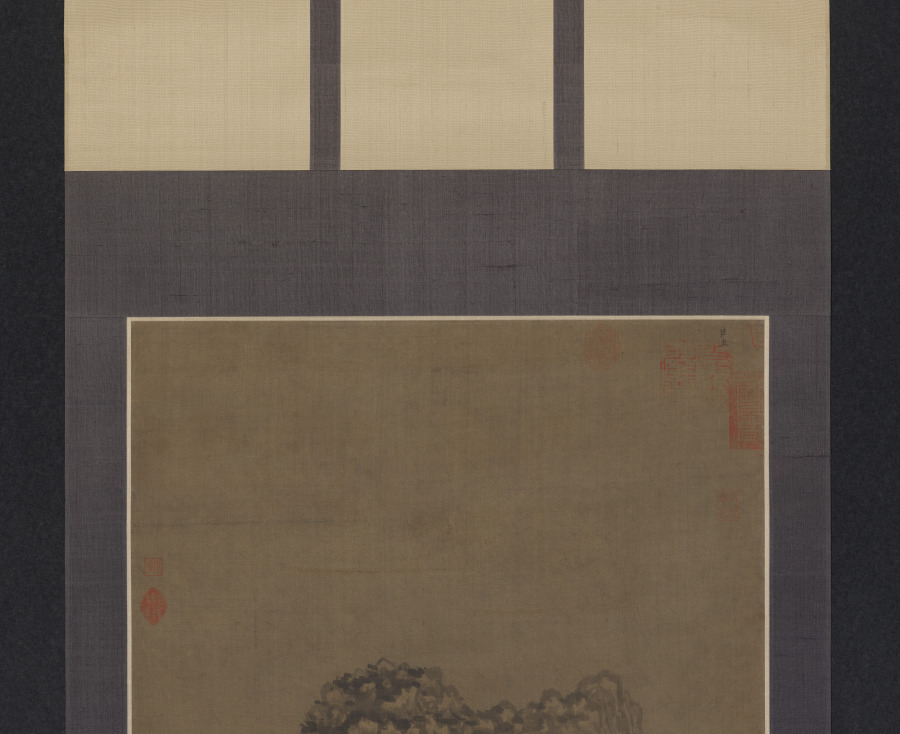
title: Buddhist Retreat by Stream and Mountains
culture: China, Northern Song dynasty (960-1127)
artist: Juran (Chinese, active 960–985)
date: 960–85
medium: Hanging scroll; ink on silk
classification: Painting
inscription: The upper portion of the scroll: the two small characters, “Ju wu 巨五”, written near the large seal. Written by a functionary in Shang Shu Sheng (the Department of State Affairs) when the painting was first received.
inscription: The upper portion of the scroll: the large seal, “Shang Shu Sheng yin 尚書省印” (seal of the Department of State Affairs)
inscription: The upper portion of the scroll: the half-seal “Si yin 司印”, seen along a border. Attributed to 典禮紀察司 of Ming dynasty.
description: Monk Juran served the Southern Tang (937–75) imperial house in Nanjing, where he studied with Dong Yuan (active 930s–60s). Both founded the southern landscape tradition, or Jiangnan school, known for gentle misty riverscapes in wet ink. Juran moved north to Kaifeng when the Southern Tang surrendered to the Northern Song, the impact of which may be seen in this painting, presumably painted after 976. A towering mountain dominates the composition, typically representing the style of the Northern Song academy; while the use of long hemp fiber strokes to texture the mountains, wet dots, and round boulders on mountain tops are elements of the southern landscape tradition.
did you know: This hanging scroll with the towering mountain is a prime example of the monumental landscape style of Northern Song.